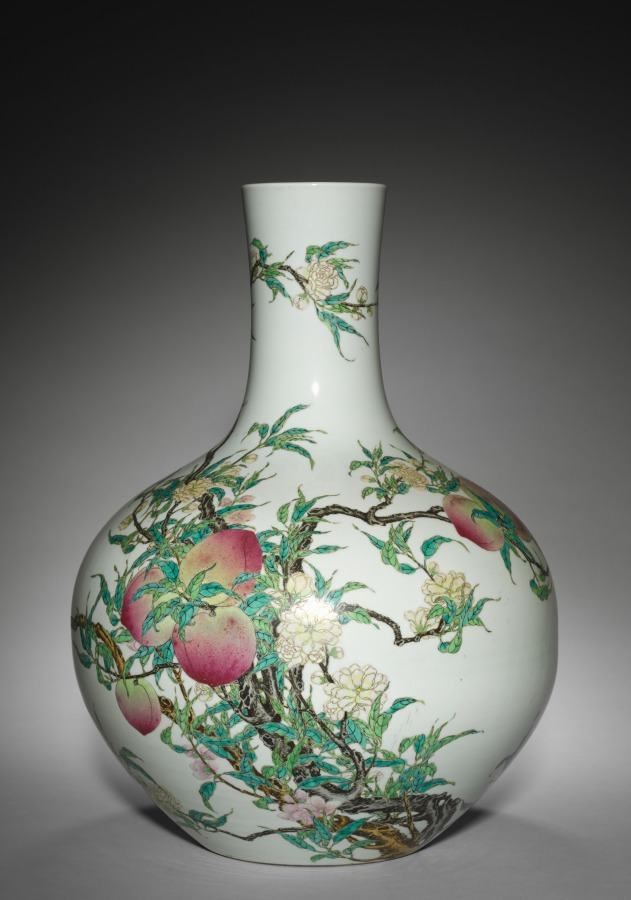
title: Vase with Peaches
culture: China, Jiangxi province, Jingdezhen, Qing dynasty (1644-1911), Qianlong mark and period (1736-1795)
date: 1736–95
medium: porcelain with famille rose overglaze enamel decoration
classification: Ceramic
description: This spectacular vase, one of a pair in the collection, depicts flowering and fruiting peach trees to convey an auspicious message of affluence and long life. Developments in enamel technology led to new possibilities in polychrome decoration of Qing imperial porcelains. Pinks appeared, lending their name to the new palette of overglaze colors (famille rose), and the addition of opaque white allowed painters to vary the value of pigments, enhancing the painterly quality of porcelain decoration.